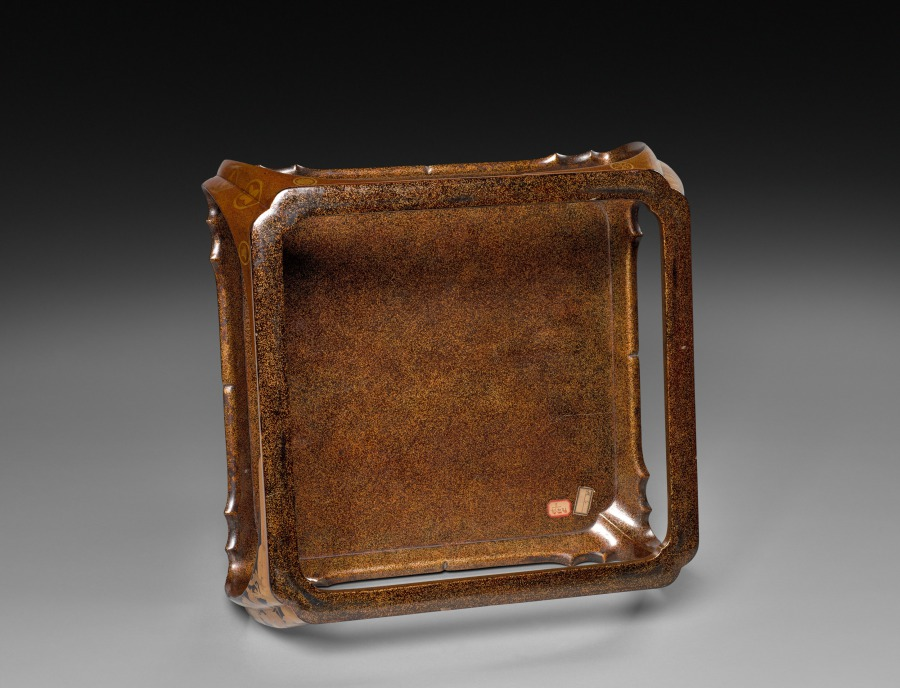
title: Table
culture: Japan, Meiji period (1868–1912)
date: 1868–1912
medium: lacquer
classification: Lacquer